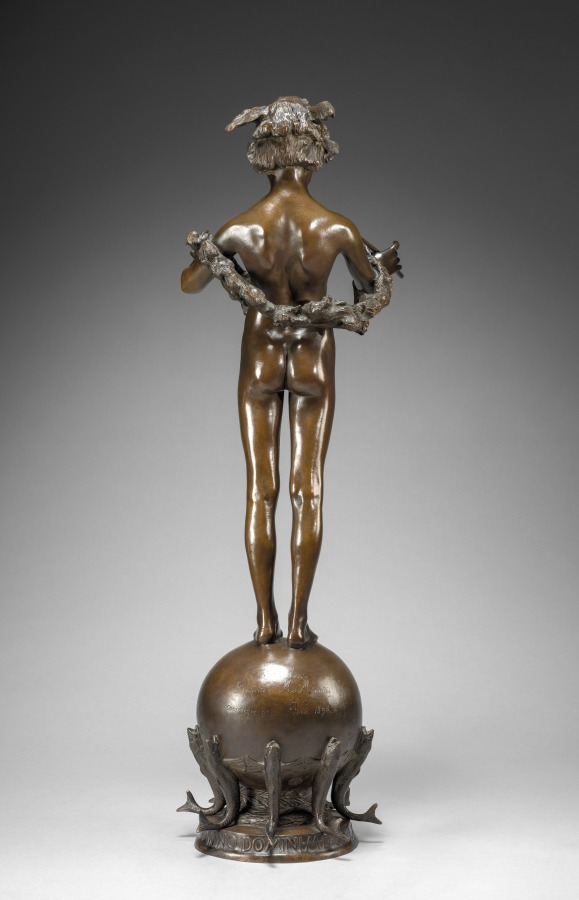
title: Pan of Rohallion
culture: America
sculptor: Frederick William MacMonnies (American, 1863–1937)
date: 1890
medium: bronze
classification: Sculpture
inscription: Signed on globe: Frederick MacMonnies, Paris 1890. © 1894. Inscribed around base: TO PAN OF ROHALLION ANNO DOMINI MDCCCLXL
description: Rohallion in the title refers to the name of an estate in New Jersey, whose owner commissioned MacMonnies to create a large fountain of this design for a garden pool. Later, the artist made several smaller versions, such as this example. Here, the ancient Greek god Pan plays his musical pipes while standing on an orb supported by fish.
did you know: The character of Peter Pan, including his flute playing, references the Greek god Pan.